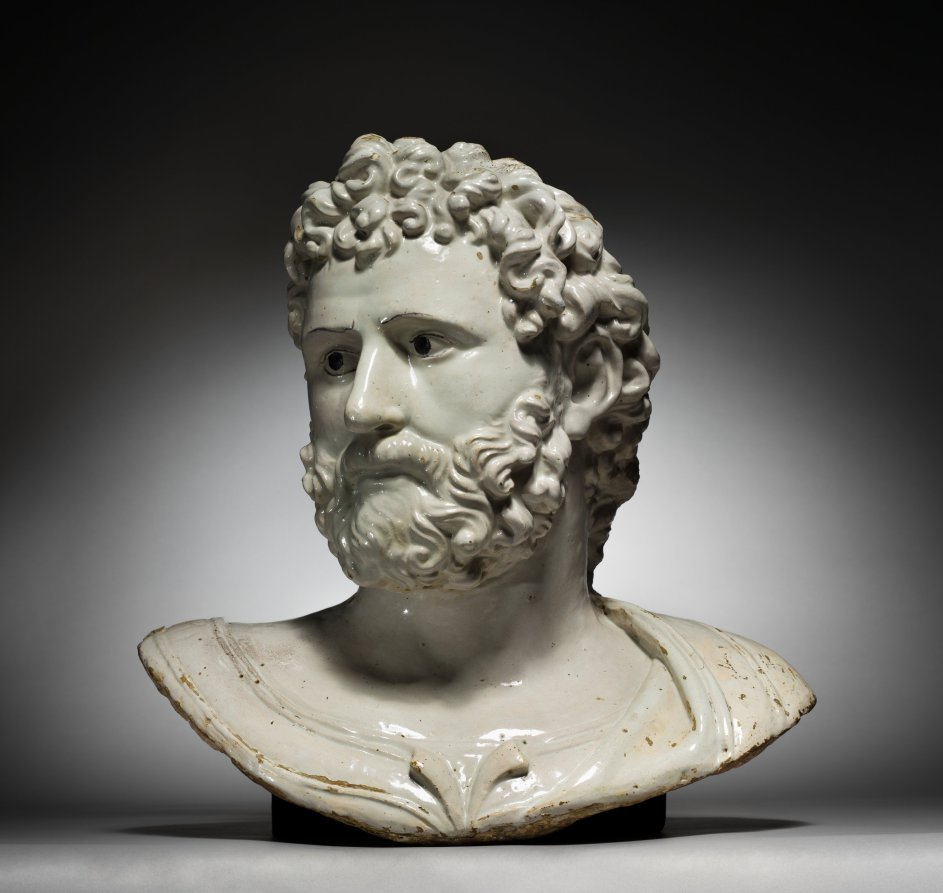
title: Bust of a Classical Hero or Emperor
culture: Italy, 16th century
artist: Girolamo della Robbia (Italian, 1488–1566)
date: early to mid 16th century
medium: glazed terracotta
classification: Sculpture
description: This bust most likely represents an emperor or condottiere from classical antiquity, and probably formed part of a series of classical heads. Such groups of worthies were featured as decorative schemes in the studioli and architectural projects of Renaissance statesmen. Attesting to the sophistication of their learned patrons, these busts also provided the opportunity for artists to explore the contemporary stylistic relevance of classical portraiture—a source of fascination and inspiration for Florentine sculptors of this period.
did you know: Head-and-shoulders portraits, known as busts, were popular from Roman times.